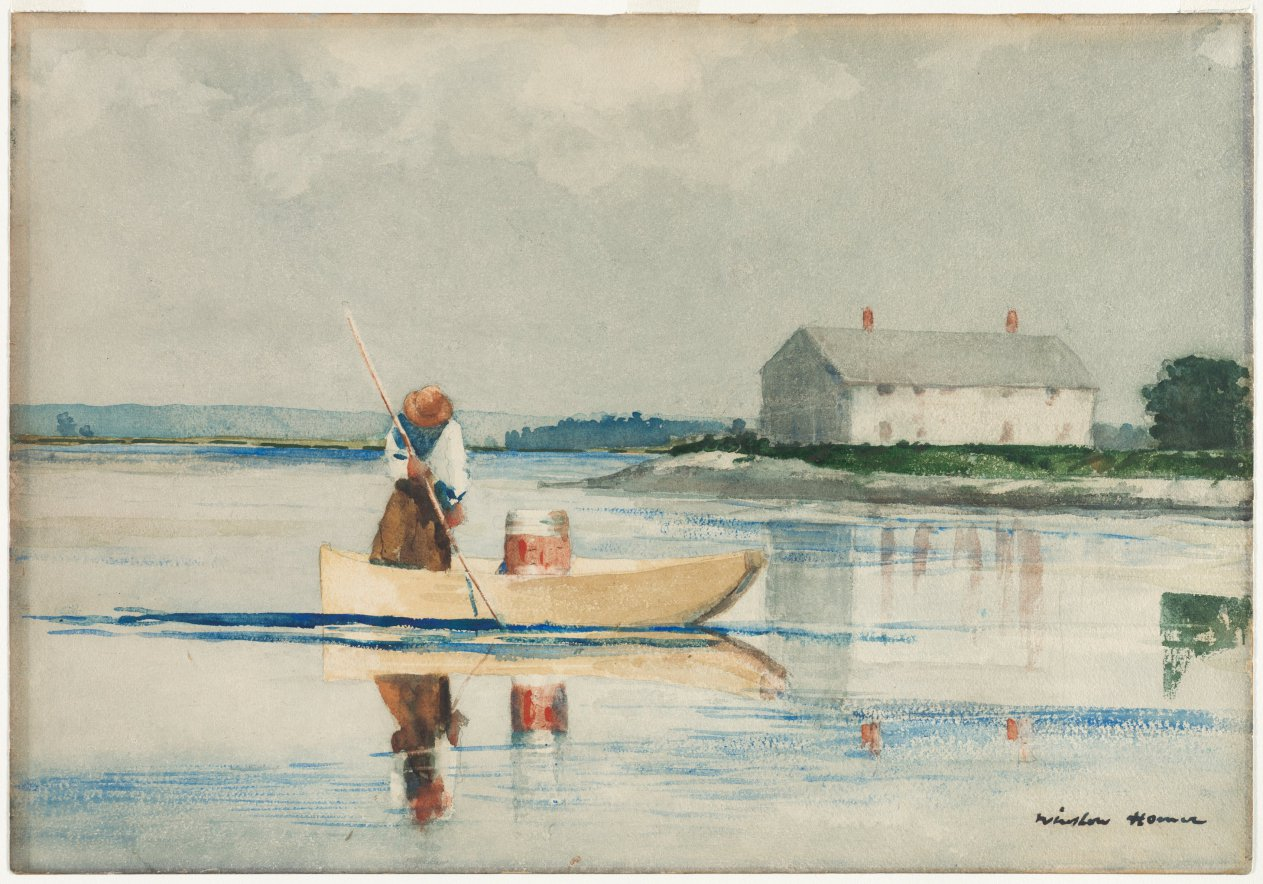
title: Spearing Eels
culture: America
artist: Winslow Homer (American, 1836–1910)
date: late 1800s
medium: watercolor with graphite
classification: Drawing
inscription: lr: Winslow Homer; rev: Scarboro, Maine, 2 miles from Prout's Neck, Tom Lee spearing eels